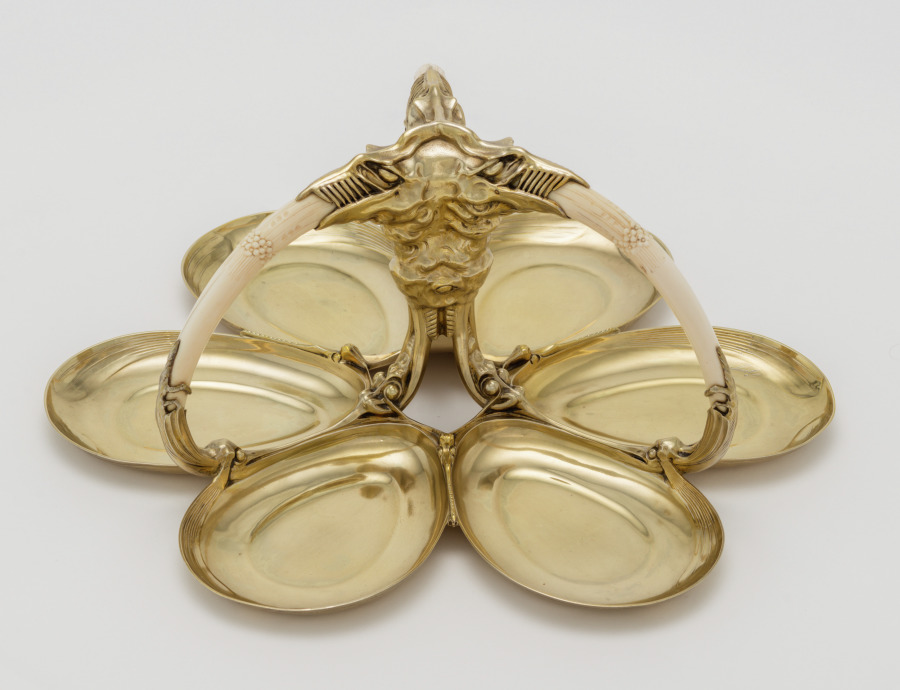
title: Salver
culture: France, Paris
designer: Carlo Bugatti (Italian, 1856–1940)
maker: Adrien-Aurélien Hebrard (French, 1866–1937)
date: c. 1907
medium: Gilt silver and ivory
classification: Silver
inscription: inscribed inside one of six ovoid compartments: "Bugatti" in ligature. Engraved on back: A.A. HEBRAND/ 8 RUE ROYAL/PARIS FRANCE.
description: This tea and coffee service, salver, and table, together with some now missing cups, were all designed by Carlo Bugatti as an ensemble and presented at the 1902 exposition devoted to decorative arts in Turin, Italy. The set was probably acquired from Bugatti's 1907 exhibition at the Galerie Hébrard in Paris by a wealthy South African widow, Anna Blake, who was living there at the time. Some of the animal and insect motifs suggest mythical beasts or the fossils of prehistoric animals. When Mrs. Blake returned to Cape Town, she took these and other pieces designed by Bugatti with her, and they remained in South Africa throughout her lifetime.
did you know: Carlo Bugatti's sons achieved illustrious careers of their own. Rembrandt Bugatti (1884-1916) became a celebrated sculptor, and Ettore Bugatti (1881-1947) manufactured luxurious automobiles and racing cars.